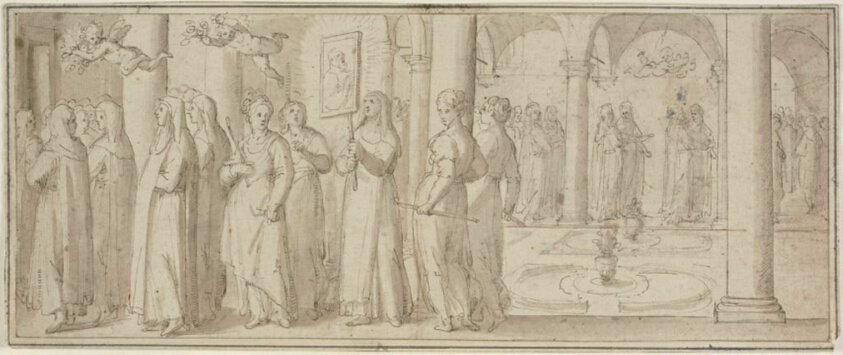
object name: Drawing and Watercolor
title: Procession of Nuns and Novices Honoring a Male Saint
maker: Circle of Giovanni Balducci, called il Cosci; Italian, c. 1560-1631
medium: Pen and brown ink with brush and brown wash, over black chalk, on ivory laid paper, laid down on ivory laid paper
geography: Italy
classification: pen and ink drawings; drawings (visual works); prints and drawing